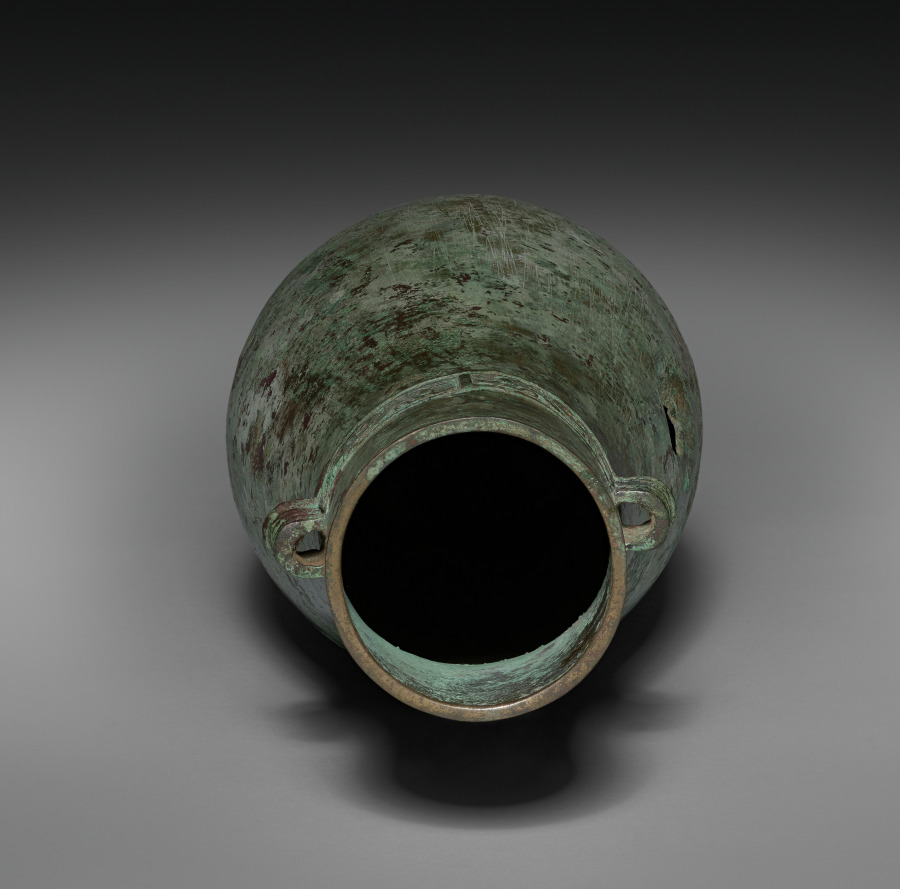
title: Wine Vessel (Hu)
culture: China, Western Zhou dynasty (c. 1046–771 BCE)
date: c. 1000–900 BCE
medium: bronze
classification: Metalwork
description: This tall, slender bronze wine vessel, called a hu, has three bands of ornamentation: one above the foot, one around the neck, and one on the cover. Stylized birds or phoenixes are in the band around the neck, while the band on the cover and foot feature geometric dragons. The dragon and the phoenix may represent the Yin and Yang and would be equally appropriate on a bronze of either secular or religious purposes. When inverted, the cover forms a cup. It likely held liquids like wine at festive banquets or religious ceremonies.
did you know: The cylindrical "handles" suggest that the vessel was carried by a cord.